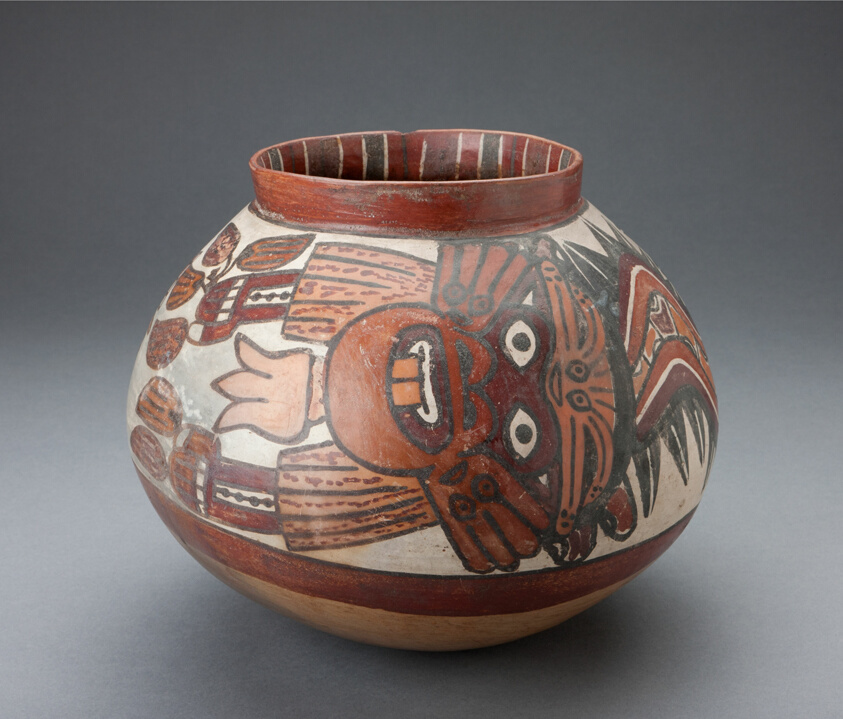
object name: Vessel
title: Jar Depicting a Costumed Ritual Performer Holding Plants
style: nazca, early intermediate period, Pre-Columbian, americas, Arts of the Americas, andean, andes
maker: Nazca; South coast, Peru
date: 180 BCE–500 CE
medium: Ceramic and pigment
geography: Nazca Valley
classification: earthenware; art of the americas; ceramics; vessel